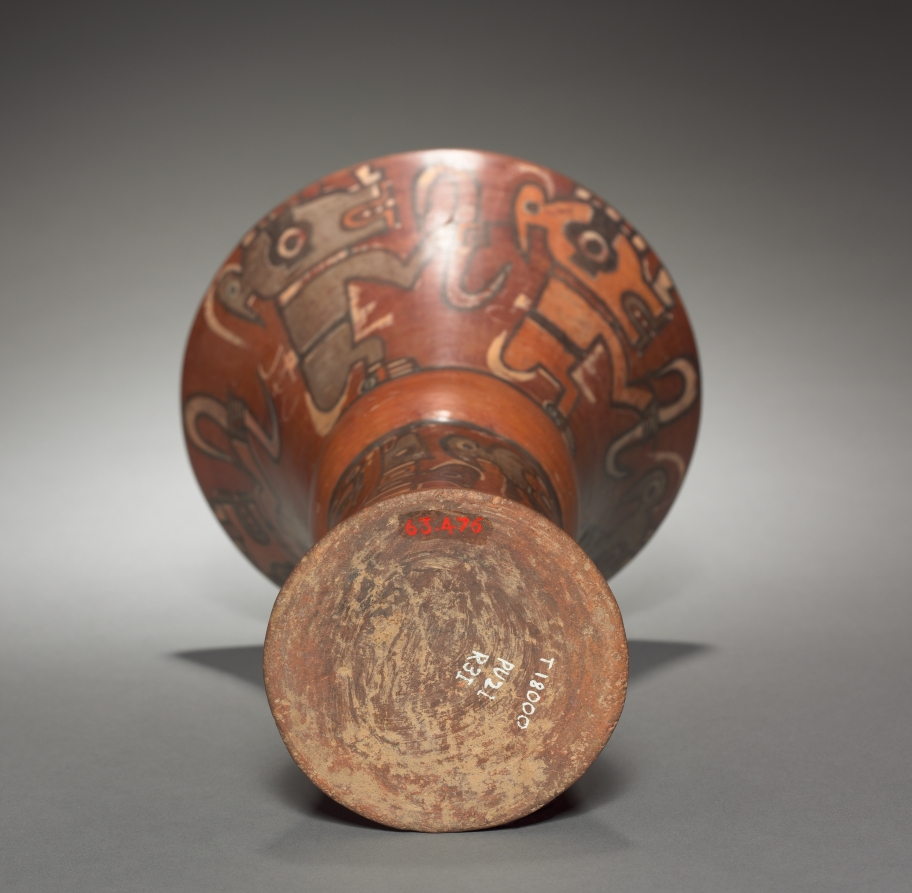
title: Kero (Waisted Cup)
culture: Bolivia, Cochabamba(?), Tiwanaku style, 400-1000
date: 400–1000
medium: earthenware with colored slips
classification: Ceramic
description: The kero is a distinctive Tiwanaku vessel form, imitated by the later Inka, who used the cups in political and religious ceremonies. It is assumed that the same was true at Tiwanaku, where impressive stone figures, perhaps rulers, hold keros as though they are emblems of authority. Perhaps, like the Inka, the Tiwanaku used keros to drink chicha, a corn beer shared to cement bonds of mutual obligation among allies.